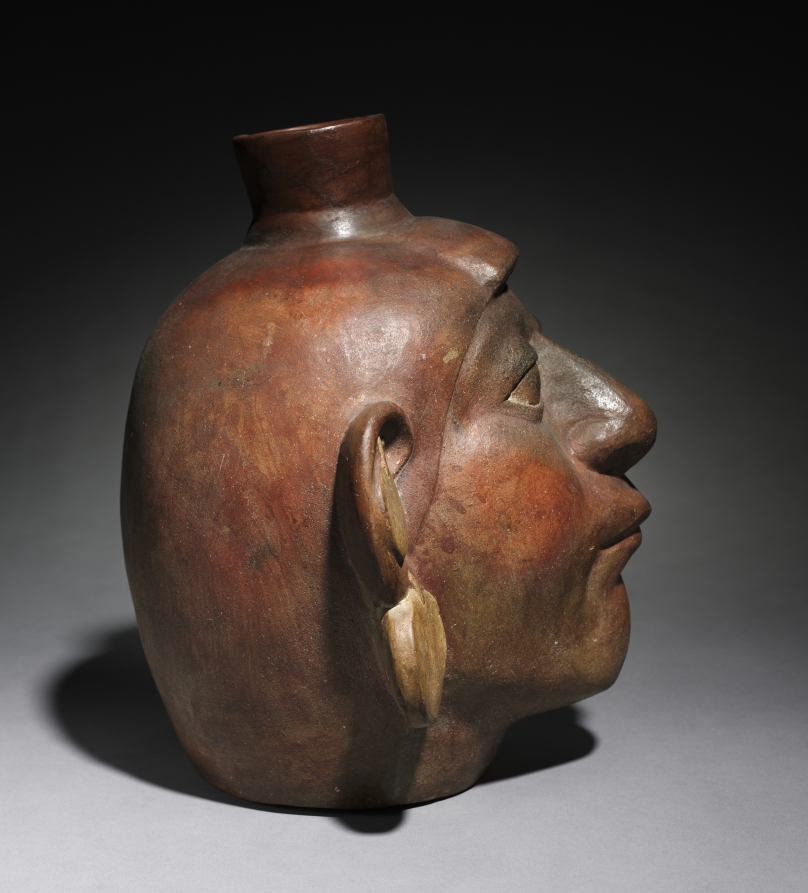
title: Portrait Head Vessel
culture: Peru, North Coast, Moche style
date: 200–550 CE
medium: earthenware with colored slips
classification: Ceramic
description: The Moche were unique in ancient Peru in creating realistic human portraits, usually in the form of ceramic vessels. This large example may represent an important captive who, like some Moche prisoner figures, wears double earrings and a hank of hair over the forehead.